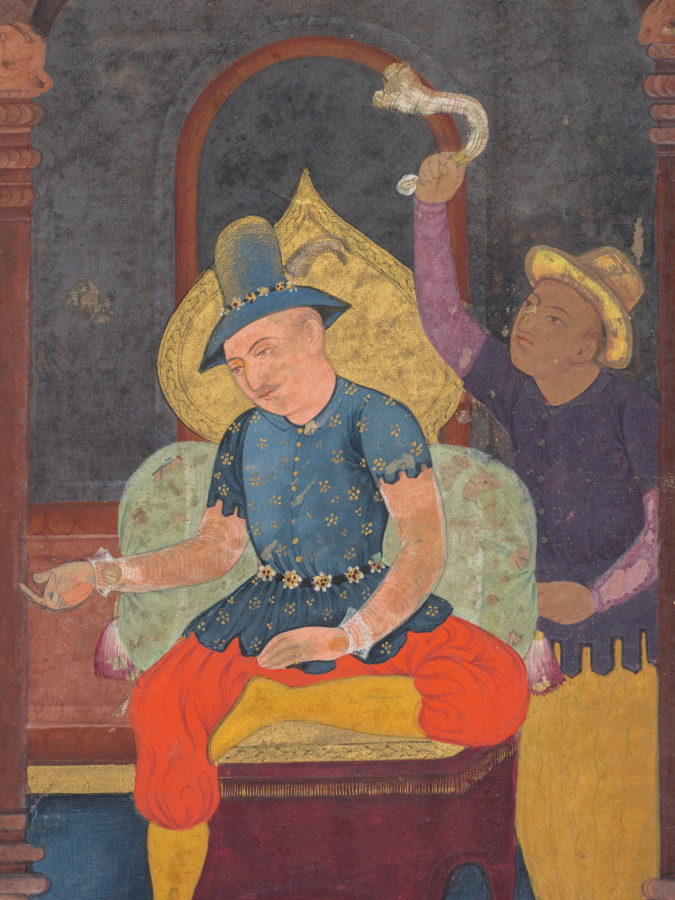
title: Salome Receiving John the Baptist’s Head on a Platter (folio 112 verso), from a Mirror of Holiness (Mir’at al-quds) of Father Jerome Xavier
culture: Mughal India, Allahabad, made for Prince Salim (1569–1627)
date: 1602–4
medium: Gum tempera, ink, color, and gold on paper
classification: Manuscript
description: Herod, King of Judea, sits on a Mughal-style throne as his wife’s daughter Salome reaches for the freshly severed head of John the Baptist. John had offended Herod’s wife, so she took revenge by having her daughter seduce Herod into granting her this wish. Salome is depicted modestly in this painting, and the court musician at the lower left looks on in disgust. The lion head capitals on the pillars above Herod are upside down, seemingly in disapproval of the debauched king.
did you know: Column capitals in Herod’s palace have angels seated on upside-down lion heads.